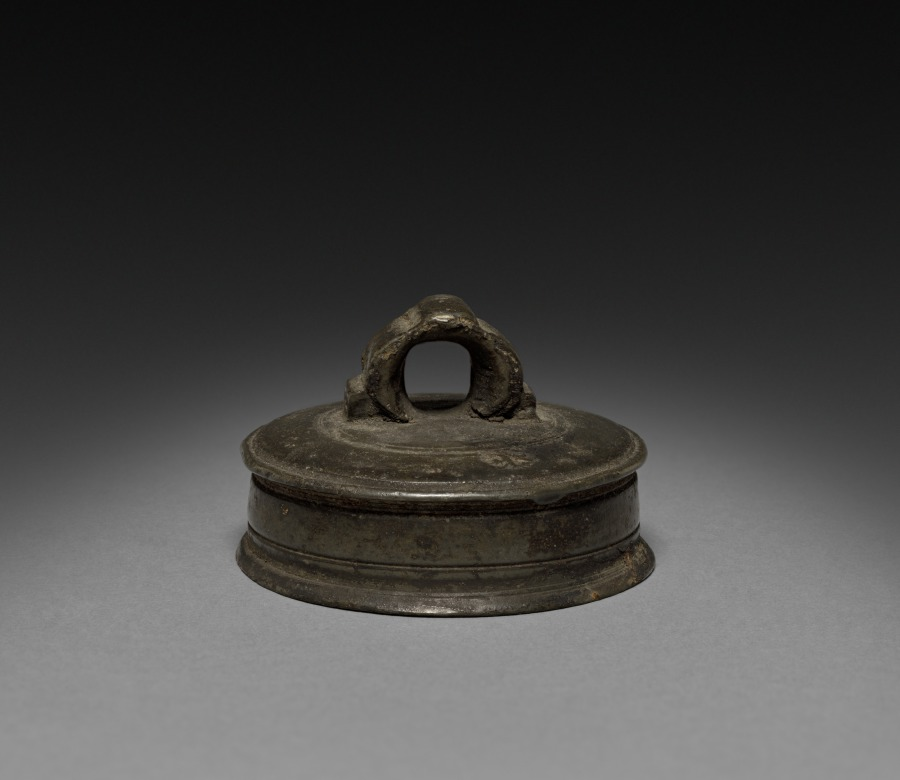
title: Screw Top for a Bottle (Schraubflasche)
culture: Germany, Bavaria, Kreussen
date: c. 1660–80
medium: pewter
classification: Ceramic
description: Bottles or jars (kruken) of this type of six-sided form are most often associated with the ceramic tradition found in Kreussen (now Creussen) in the Bavarian region of Germany during the mid to late 1600s. With a threaded neck fitted with a pewter screw top and ring, they were ideal vessels for medicinal liquids as they could be easily connected to a belt for transport to the patient. Applied decoration depicting the twelve apostles, as on this example, allude to the spiritual nature of healing.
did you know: This screw top adorns the top of a bottle.